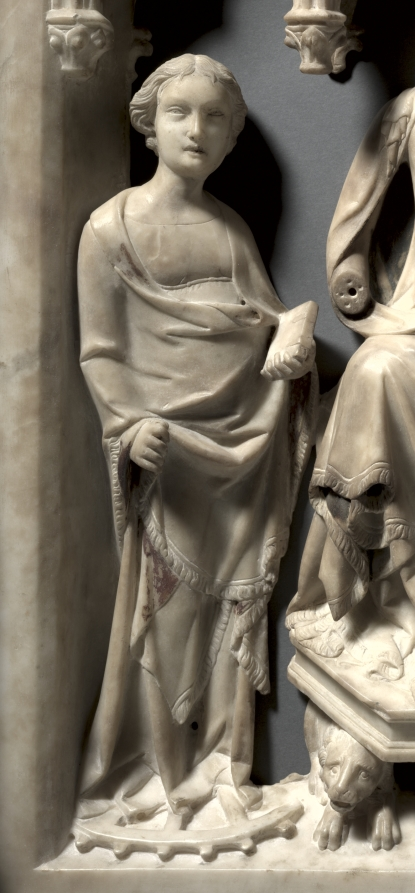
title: Madonna and Child with Saints Catherine and John the Baptist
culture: Italy, Siena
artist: Giovanni di Agostino (Italian, c. 1310–1370)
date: c. 1340–50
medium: marble with traces of polychromy and gilding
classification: Sculpture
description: The Madonna is seated beneath a Gothic-arched canopy flanked by Saints Catherine and John the Baptist. A rectangular frame encloses the group. Most likely from a Sienese church interior, the work is probably a fragment of a larger sculptural program such as a tomb. An authentic Gothic style in sculpture appeared in Tuscany from the mid 1200s through about 1350 elucidated by the work of Giovanni di Agostino, Nicola and Giovanni Pisano, and others who were active on Siena Cathedral’s sculptural program. Agostino’s work suggests an awareness of Gothic sculpture and the decorative arts in France from which he borrowed freely. This relief was probably completed just before the plague of 1348, an event which altered the degree and character of Sienese art.